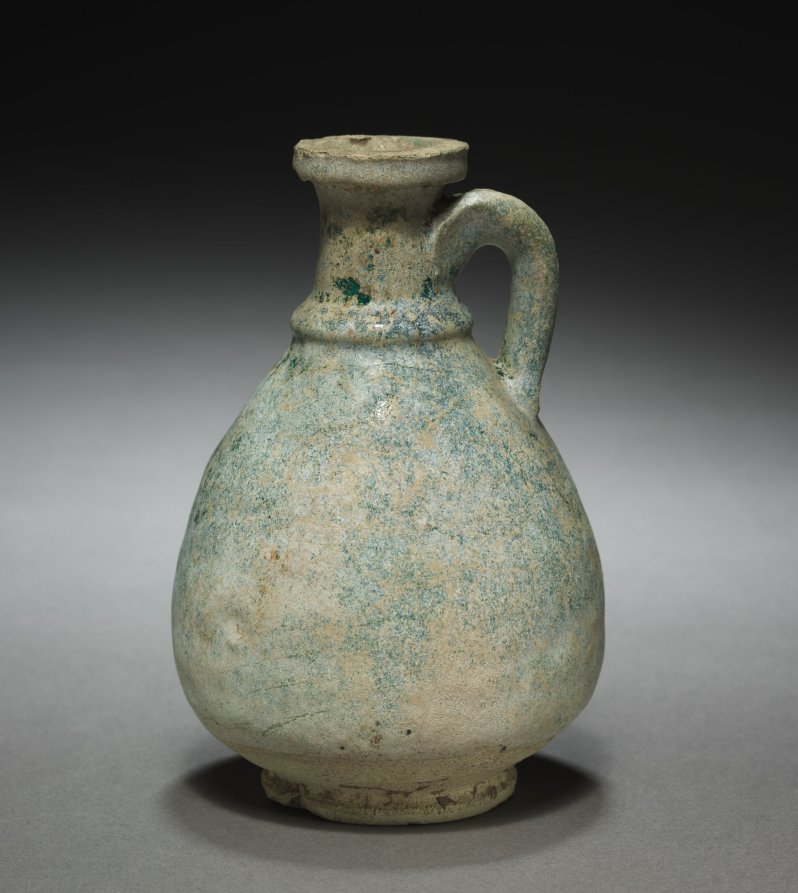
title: Jar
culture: Parthian Empire (247 BCE–224 CE)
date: 1–200 CE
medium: earthenware with weathered glaze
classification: Ceramic